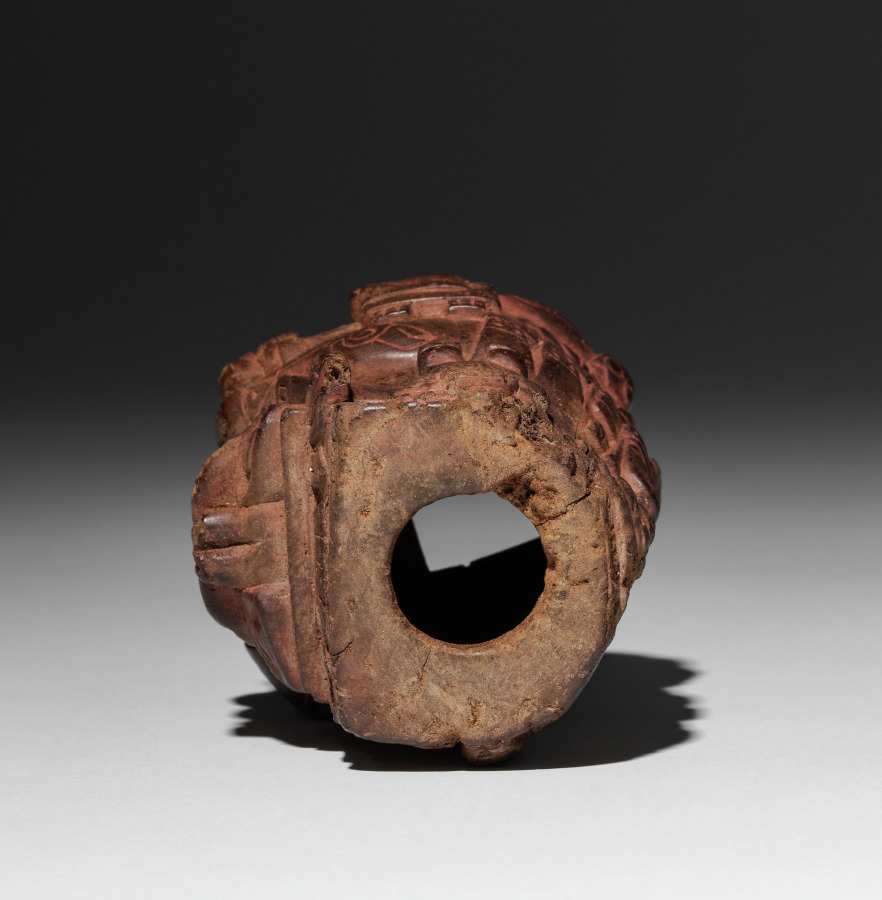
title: Container in the form of a Sacrificer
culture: Peru, Middle Horizon, Wari Culture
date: 770–890 (radiocarbon date, 95% probability)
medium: wood and red pigment (cinnabar)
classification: Wood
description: This container assumes the shape of a magnificent, feline-headed, supernatural sacrificer who draws a knife across the throat of the human it holds in its lap. Severed human heads hang from the feline's belt and dangle by the trachea at the back of its headdress. Sacrifice had a place in Wari religious practice, probably as an unusual and exceptionally precious offering made to entice the benevolence of cosmic forces. Indeed, colonial-period Andean people believed that death was a prerequisite for the renewal of the world.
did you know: Traces of cinnabar, a toxic mercuric sulfide, are visible on the container's surface.